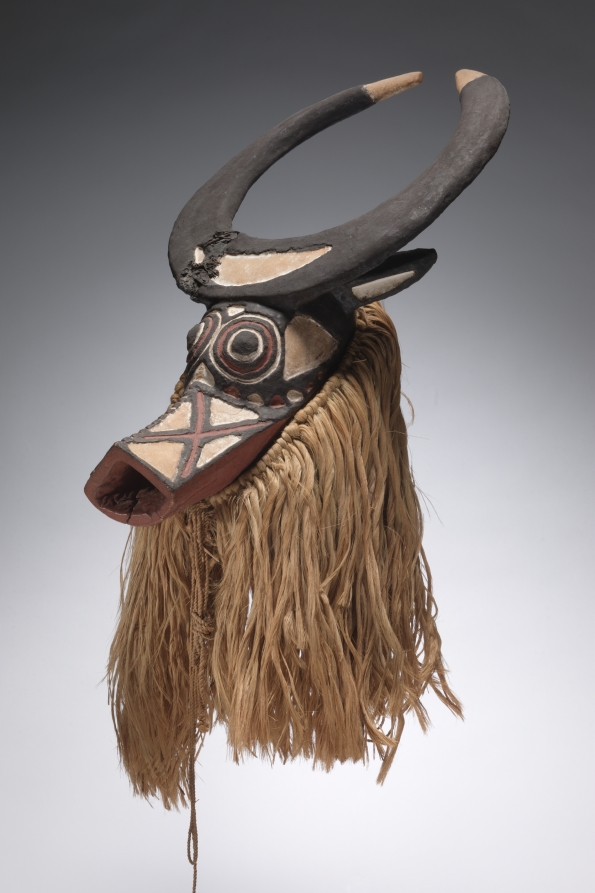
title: Buffalo Mask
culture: Africa, West Africa, Burkina Faso, possibly Bwa-style maker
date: early to mid-1900s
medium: Wood, plant fibers, paint, and iron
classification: Mask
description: Among the Bwa people, masks with human, animal, and fantastic traits typically represent protective bush spirits. This mask’s horns and muzzle identify it as a bush buffalo. Masked dancers appear during the dry season for initiations, funerals of elders, market days, harvest celebrations, and annual renewal rituals to protect the well-being of the community.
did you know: Once broken, the right horn of this mask was repaired; this indicates that it was valued.